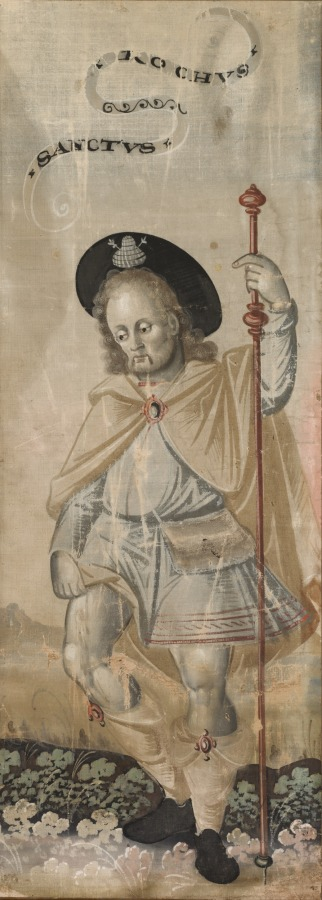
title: Saint Roch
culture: Japan, Momoyama period (1573–1615)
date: early 1600s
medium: polychromy on cloth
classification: Painting